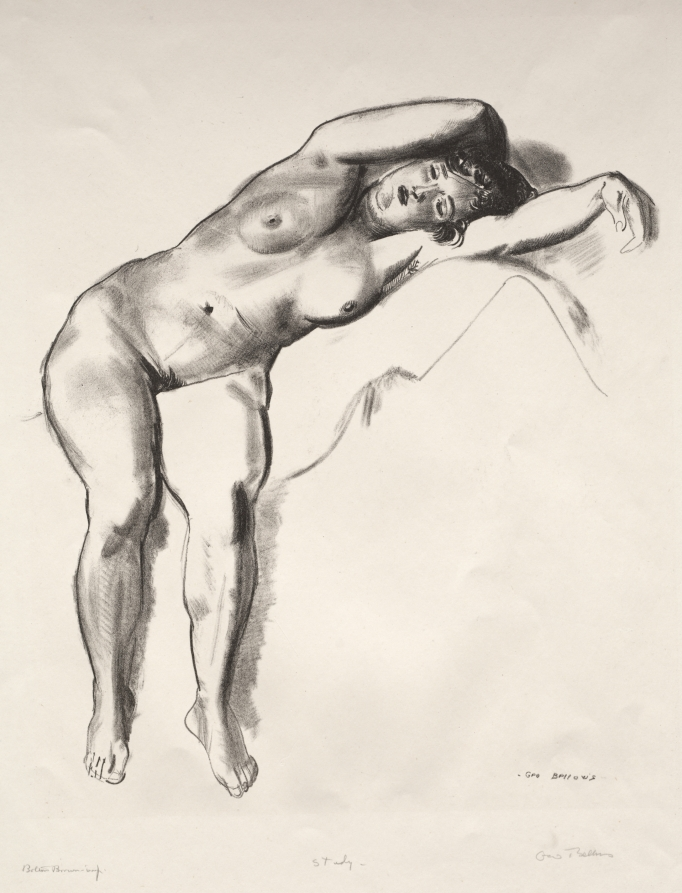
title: Nude Study, Woman Stretched on Bed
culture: America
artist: George Bellows (American, 1882–1925)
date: 1924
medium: lithograph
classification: Print